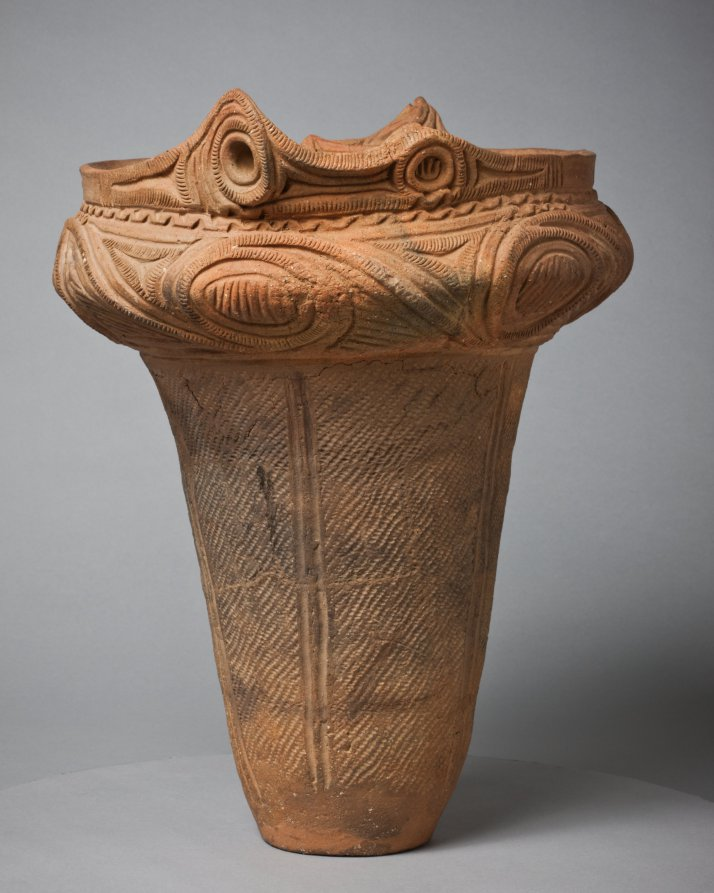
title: Urn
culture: Japan, Jōmon period (c. 10,500–300 BCE)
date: c. 2000 BCE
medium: earthenware, terracotta, impressed and incised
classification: Ceramic